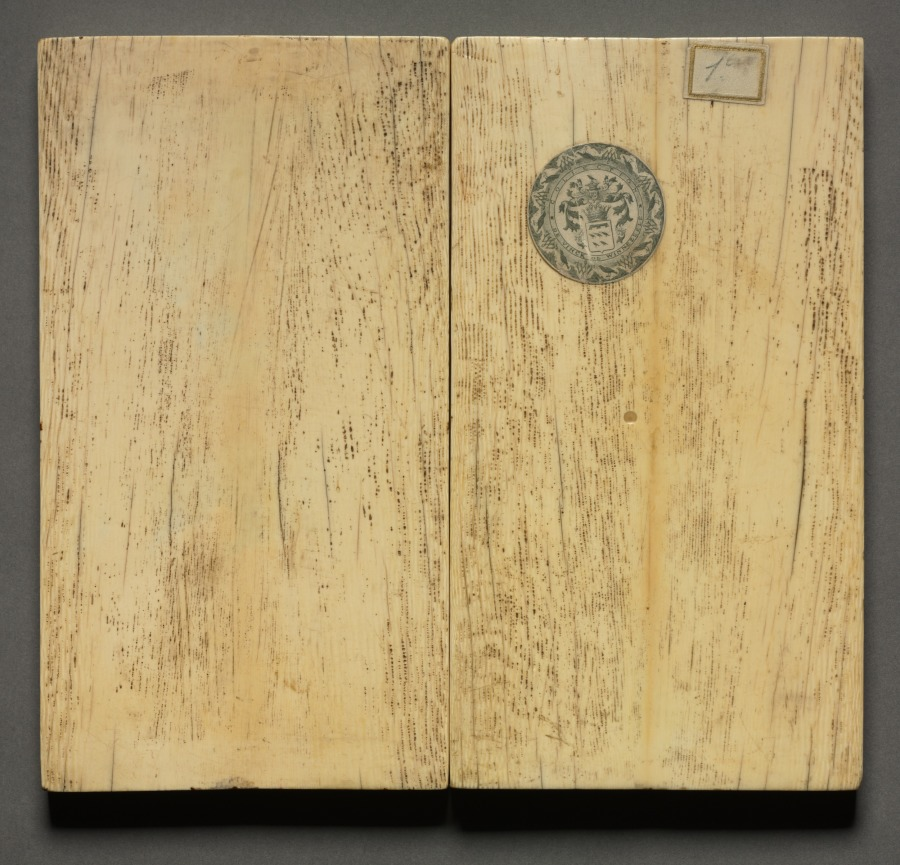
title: Diptych with Scenes from the Life of Christ (left wing: Raising of Lazarus and Crucifixion) (right wing: Entry into Jerusalem and Entombment)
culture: Germany, Thuringia or Saxony, 14th century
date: c. 1350–1375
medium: ivory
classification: Ivory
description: Ivory diptychs (two panels hinged together) were used for private devotion by their aristocratic owners. The scenes represented here are Christ’s Entry into Jerusalem, the Raising of Lazarus, the Crucifixion, and Christ’s Entombment. They suggest choices made by the original owner who wished to contemplate these aspects of Christ’s passion.